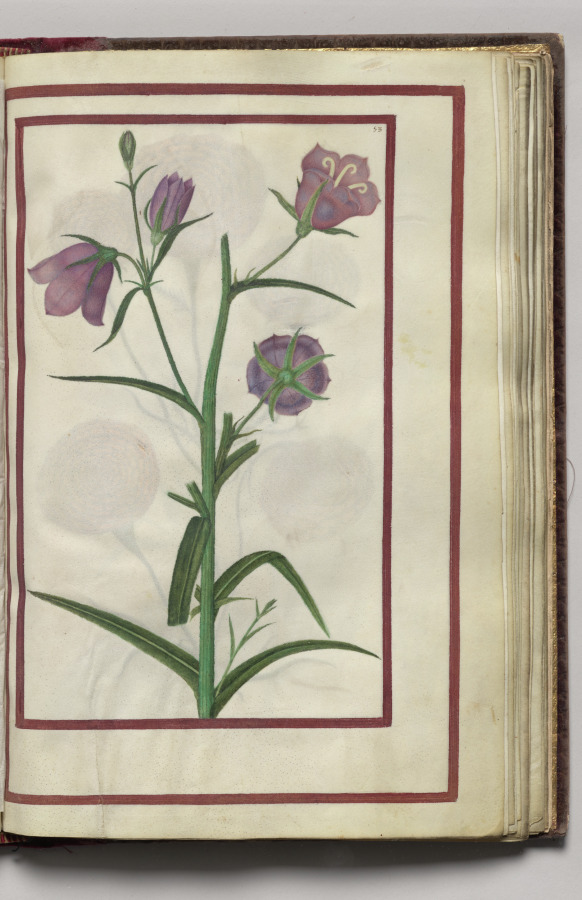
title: Campanula, folio 27 (recto), from Florilegium (A Book of Flower Studies)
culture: France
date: 1608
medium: watercolor, ink, silver, and gold over occasional traces of pencil, on vellum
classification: Bound Volume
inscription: Dated: Poitiers 1608 (on frontispiece) Signed: On frontispiece in black ink, lower right: Van Kuyk Notation on drawing: Frontispiece: in pencil, lower margin: * élève de Van Kessel, peintre flammand (* in pencil also appears in front of Van Kuyk's name).